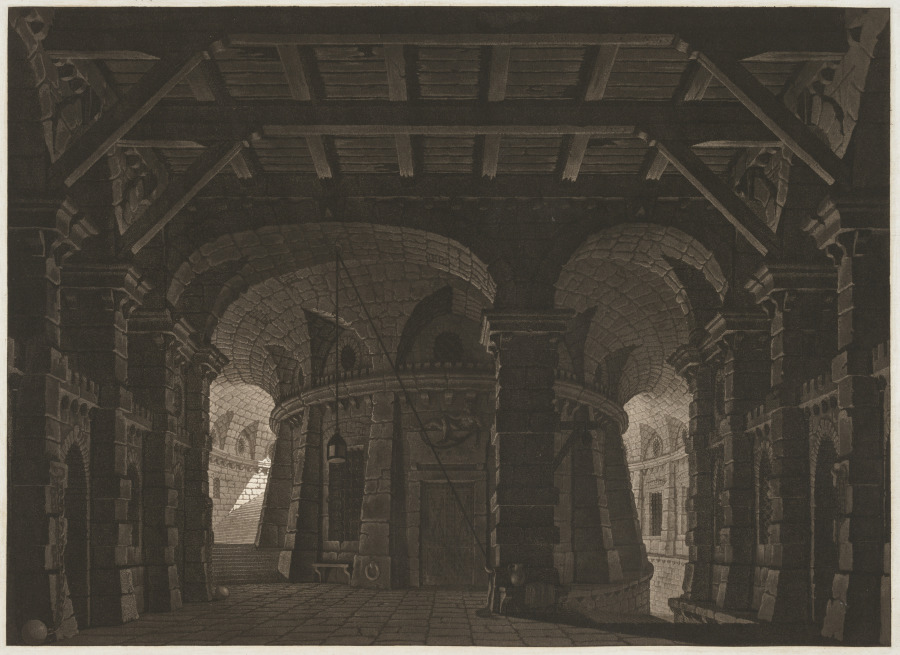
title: Subterranean Jail for the Stage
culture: Germany, 18th century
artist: Abel Schlicht (German, 1754–1826)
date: 1788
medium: etching and aquatint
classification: Print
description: Trained as an architect, Abel Schlicht also designed stage sets for the Mannheim National Theater. An important forum for German cultural identity, the theater was one of the first companies to produce exclusively German-language plays, including those by beloved playwright Friedrich Schiller. Prisons were an especially popular drama subject in the 1700s, and sets would have featured in multiple productions. Here, Schlicht employed aquatint to render the gloomy space of one of his prison scenes. This technique enabled the artist to create the range of tones used to illuminate the background and plunge the foreground into darkness.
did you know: Since none of his stage sets survive, Abel Schlicht’s prints serve as records of his lost designs.